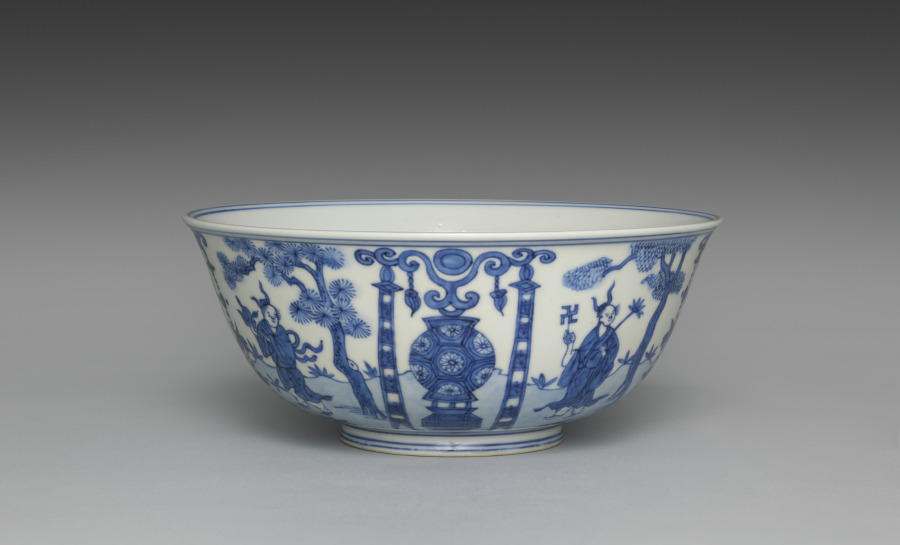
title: Bowl from Nesting Bowls with Daoist Immortals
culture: Japan, Meiji period (1868–1912)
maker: Seifū Yohei III (Japanese, 1851–1914)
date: 1893–1914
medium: Inner bowl from a set of three bowls; porcelain with underglaze blue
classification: Ceramic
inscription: 大日本清風造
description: Yohei III was capable of ink painting–like compositions in underglaze blue, as well as more decorative ones like that on this set of three nesting bowls. Bowls with very similar designs in five colors were produced in the reign of the Wanli emperor (reigned 1572–1620) during the Ming dynasty, and Yohei must have had direct access to one of these or to a close copy. A scene of Daoist immortals is presented on the bowls. On each one, the ground plane is defined with a blue wash. Four lanterns are evenly spaced around the bowl. Two are flanked with linked-piece metalwork banners of the seven treasures. The alternate altars are adorned with textile banners. In between them are four immortals, each standing beneath a tree with small plants surrounding his feet. Two of the immortals hold fruit on a tray. Another carries an elixir-filled ewer and a willow branch. The fourth holds a swastika (manji), here an auspicious symbol, and a flower. Curiously, the inscription inside each footring reads “Made by Seifu of Great Japan,” in emulation of the dynasty and reign inscriptions that appear on Chinese ceramics; however, one can also see through the translucent glaze another inscription, “Seifu Yohei,” written in large characters within a double band of blue on the largest bowl.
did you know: In the bottom of each bowl is a scene of two robed immortals who appear to stand on a precipice in a mountainous landscape high in the clouds, with celestial orbs over their heads.